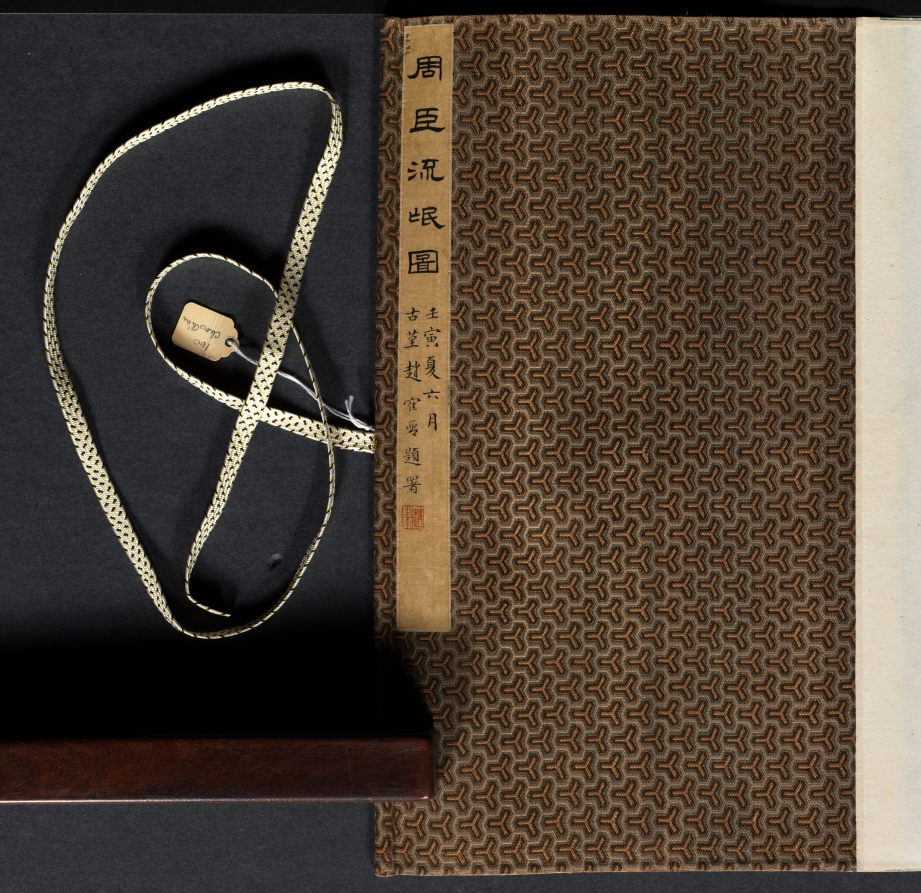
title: Beggars and Street Characters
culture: China, Ming dynasty (1368–1644)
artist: Zhou Chen (Chinese, c. 1450–c. 1536)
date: 1516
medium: Handscroll; ink and light color on paper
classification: Painting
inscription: 題: 周臣流氓圖. 古堇趙鶴琴 [印] 老鶴臨池; 鵝池軒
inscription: 正德丙子秋七月，閒窗無事 ，偶記素見市道丐者種種態度。乘筆硯之便，率爾圖寫。雖無足觀，亦可以助警勵世俗云。 東邨周臣記 [印]東邨; 舜卿; 鵝場散人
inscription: 吳中東邨周君，善丹青，尤長於人物。此圖其所見盛市丐者之狀種種，各盡其態，觀者絕倒。嗟乎，今之晝夜乞哀以求富貴者，安得起周君而貌之耶。臥雲徵君出示，余漫題其後。 甲子歲十月吳門黃姬水 [印] 士雅山人; 另一印不詳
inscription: 是冊凡數種。其飢寒流離疲癃殘疾之狀，種種之異。觀此而不惻然心傷者，非仁人也。計正德丙子逆瑾之流毒已數年。而[江]彬 [錢] 寧輩肆虐方熾。意分符剖竹諸君，亦鮮有能撫字其民者。然則舜卿此作，殆與鄭君 流民圖同意。其有補於治道者不淺，要不可以墨戲忽之也。 長洲張風翼題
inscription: 東村此筆，蓋圖寫飢寒乞丐之態，以警世俗耳。而質山 [黃姬水]欲其寫昏夜乞哀，而靈墟[張鳳翼]則擬之於安上門圖。二君之見，其各有所指哉。昔唐六如每見周筆，輒稱曰：周先生！蓋深服其神妙之不可及。若此冊者，信非他人可能而有符於六如之心伏矣。豈易得耶。若黃、張之指，則又論於畫之外，不在於形似筆墨之旨也。 萬歷丁丑十二月三日 茂苑文嘉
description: Zhou Chen from Suzhou provides rare depictions of impoverished people that once filled the city’s markets and streets. Despite Suzhou’s prosperity, its rapid growth polarized society, including the wealthy and those who had deserted their farmlands, who were without homes, unemployed, or sick. Amid these are figures who inspire fear rather than empathy. The painting may thus be informed by local practices at the end of the lunar year, in which street beggars, in exchange for food or money, would dress up like ghosts and demons to drive out evil forces.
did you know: Although Zhou Chen's original composition was an album of 24 figures, today it is mounted as two handscrolls, one in the Cleveland collection and one in the Honolulu Museum of Art.